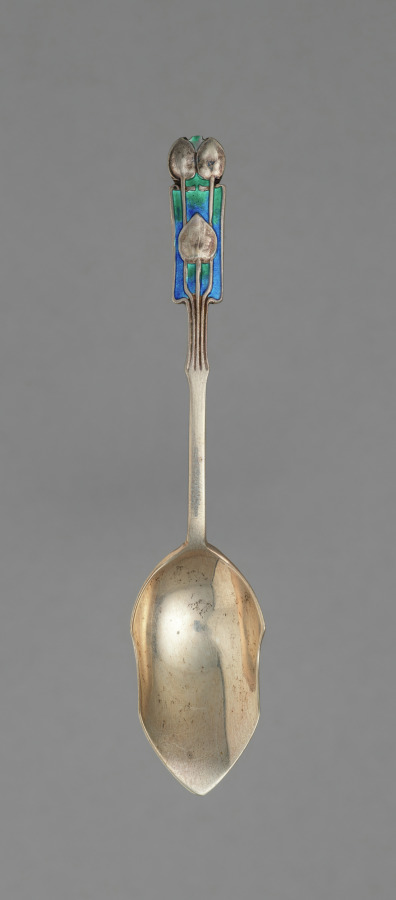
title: Set of six Spoons in Original Box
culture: England, London, 19th century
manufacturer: Liberty and Company (British)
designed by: attributed to Archibald Knox (British, 1864–1933)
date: c. 1895–1910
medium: Silver, enamel decoration and leather box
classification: Silver